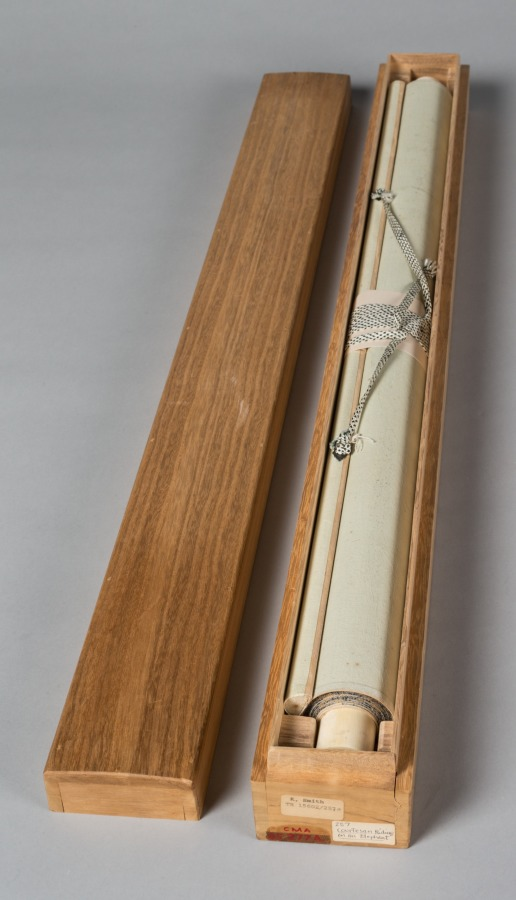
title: Stand-in Fugen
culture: Japan, Edo period (1615–1868)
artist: Kitao Masayoshi (Japanese, 1761–1824)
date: late 1700s–early 1800s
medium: hanging scroll; ink and color on silk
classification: Painting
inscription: artist's signature and two seals, lower right.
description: Here, a woman dressed as a man replaces Fugen, a bodhisattva—a being among those considered enlightened in Buddhism—who symbolizes learning as a path to awakening and typically rides an elephant. The painting teaches the lesson of impermanence through the petals falling from the lotus flower the woman holds. It also alludes to the legend of Eguchi, a 12th-century courtesan who, following an encounter with a Buddhist monk-poet called Saigyō, revealed herself to be a manifestation of Fugen.